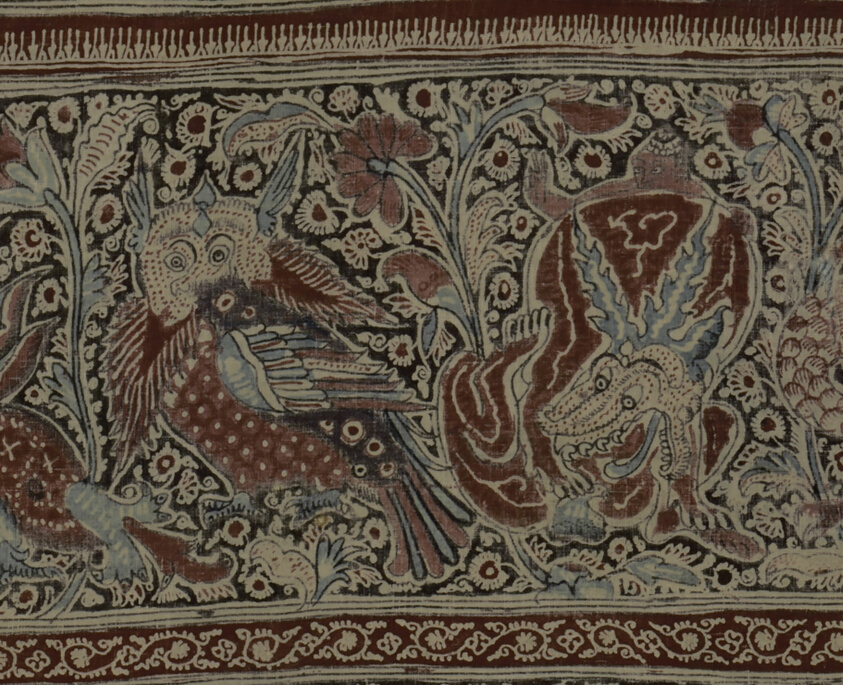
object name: Textile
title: Painted cotton with medallion and figures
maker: Deccan, India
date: 15th century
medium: cotton, plain weave; painted mordant; resist-dyed; painted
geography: India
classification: textile; weaving - printed